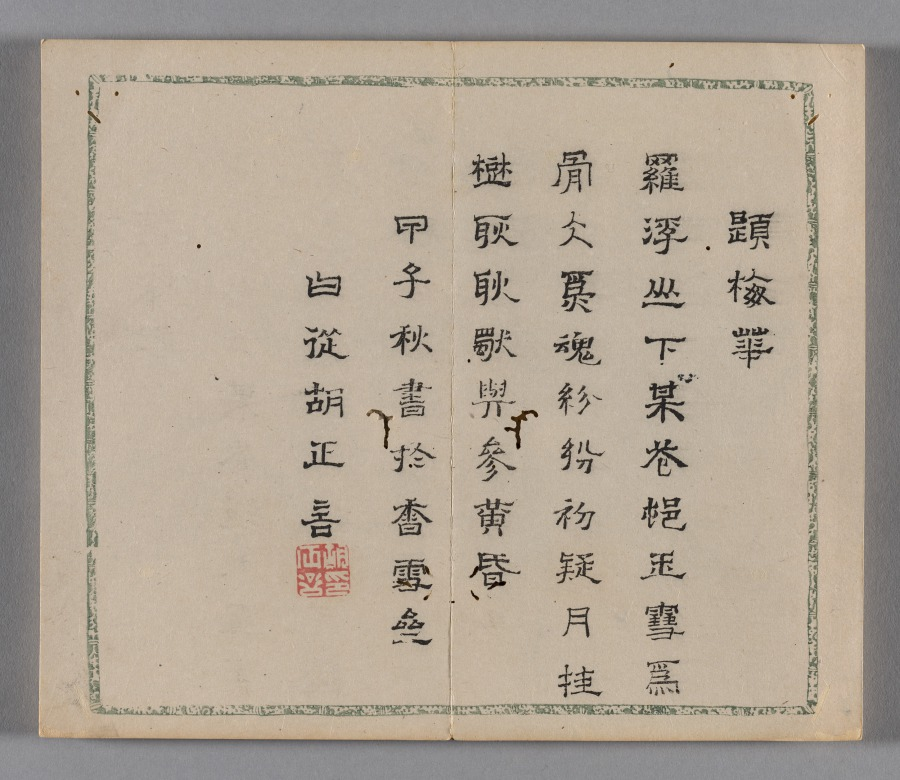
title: Ten Bamboo Studio Painting and Calligraphy Handbook (Shizhuzhai shuhua pu): Round Fans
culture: China, Qing dynasty (1644-1911)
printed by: Hu Zhengyan (Chinese, c. 1584–1674)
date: 1633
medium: Woodblock-printed book; ink and colors on paper; first edition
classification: Print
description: Color printing reached a level of perfection in the early 1600s, as seen in this Ten Bamboo Studio Collection of Calligraphy and Painting and the Mustard Seed Garden Manual of Painting (printed 1679 and 1701). The painterly quality, precision in registering (aligning) the woodblocks, and harmonious colors made them the most successful color print editions in Chinese history. Both editions were printed and compiled in Nanjing, spread nationwide, and had a great impact on the arts in Japan and Korea.